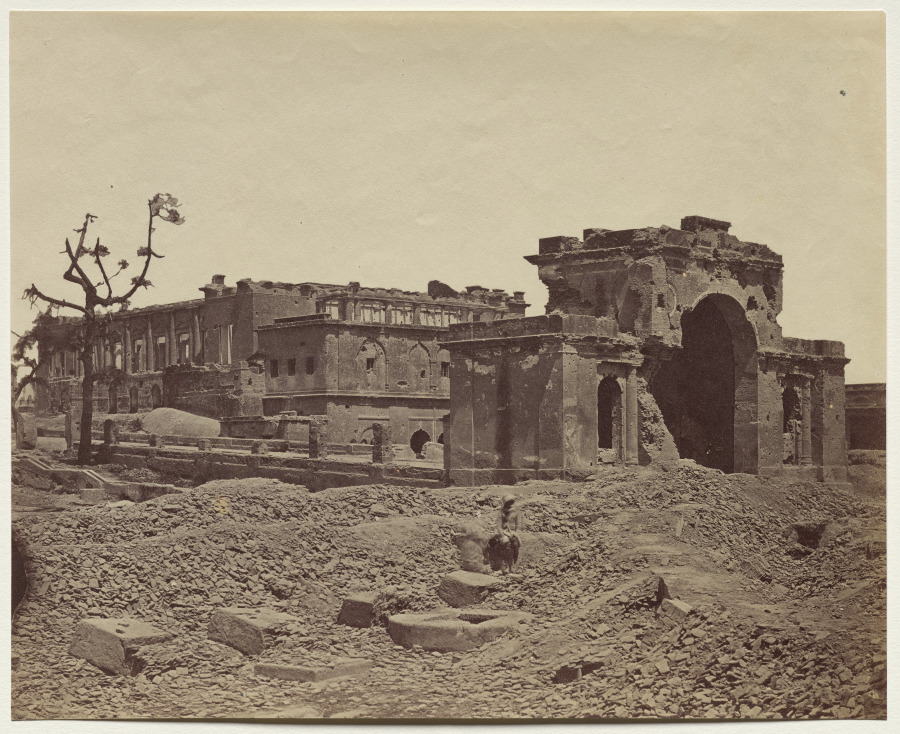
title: Gateway and Banquetting Room Inside the Residency, Used as Hospital by the Garrison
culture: England, 19th century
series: Lucknow After the Siege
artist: Felice A. Beato (British, 1832–1909)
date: 1858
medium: albumen print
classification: Photograph